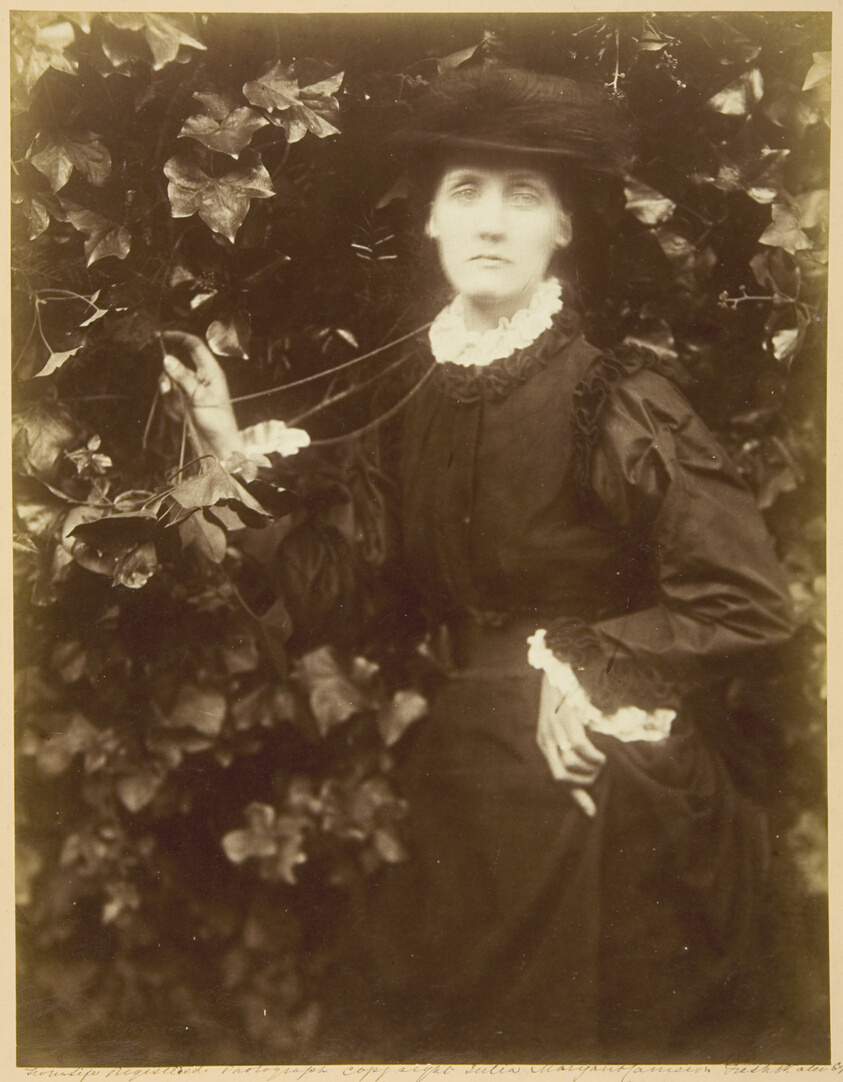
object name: Photograph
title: Mrs. Herbert Duckworth ("She Walks in Beauty")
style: 19th century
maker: Julia Margaret Cameron (English, 1815–1879)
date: September, 1874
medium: Albumen print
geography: England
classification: albumen silver print; photographic process; photography; photograph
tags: Collected by Hugh Edwards, portraits: female subject, photography, portraits